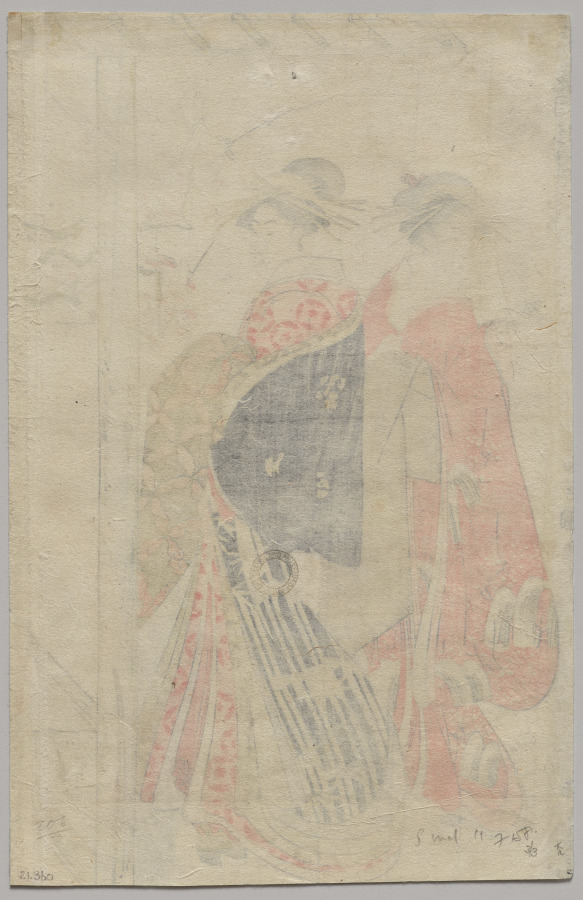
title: Courtesans of the Ōgiya on a Spring Outing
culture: Japan, Edo period (1615–1868)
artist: Utagawa Toyokuni (Japanese, 1769–1825)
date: mid- or late 1790s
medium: One of a triptych of woodblock prints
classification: Print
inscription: Signature: Toyokuni ga Publisher: Izumiya Ichibei (Senichi han) Censorship Seal: kiwame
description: In these prints, two courtesans of the Ōgiya brothel are entering an open pavilion, while another group gathers around a Japanese hibachi inside. Hanaōgi, the most celebrated courtesan of Ōgiya in the late 1700s, is depicted at a desk. Holding a brush in her hand, she turns her head to one side as if gathering her thoughts before writing in the book before her. Both her position and her loosened hair separate Hanaōgi from her courtesan companions who wear elaborate coiffures. This depiction of her captures both her knowledge of poetry and her skill as a calligrapher.